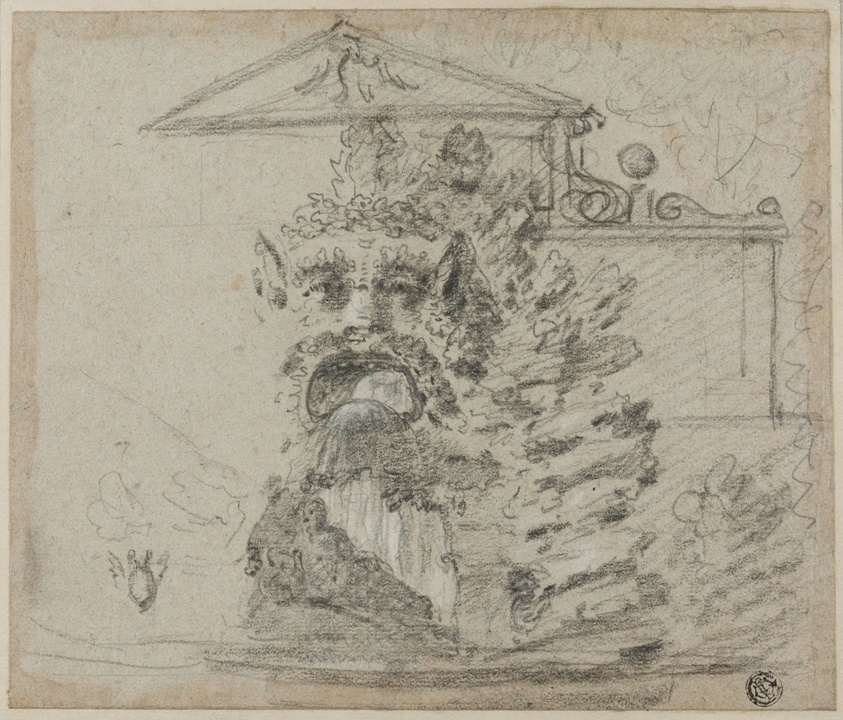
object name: Drawing and Watercolor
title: 'Il Mascherone,' a Rocaille Fountain on the Grounds of the Villa Borghese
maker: Richard Wilson (English, 1714-1782)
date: c. 1754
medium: Black chalk with touches of opaque white watercolor on blue laid paper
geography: England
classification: chalk; drawings (visual works); prints and drawing